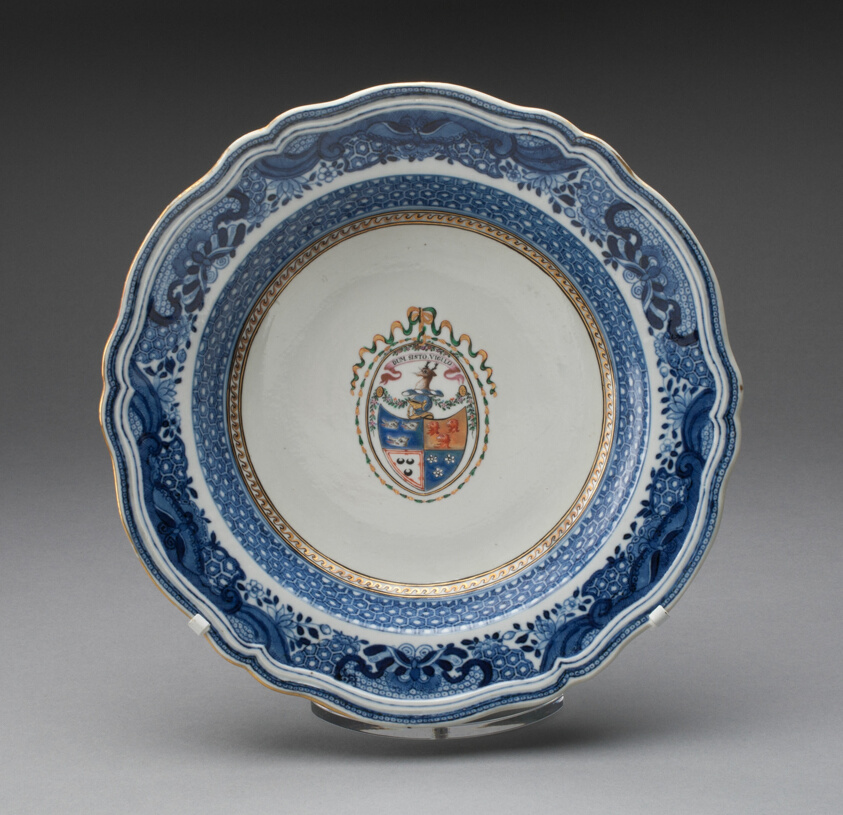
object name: Ceramics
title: Soup Plate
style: chinese export, Chinese (culture or style), East Asian, asian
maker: China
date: c. 1780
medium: Hard-paste porcelain with polychrome enamels and gilding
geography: Jingdezhen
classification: plate (general, dish); dish (vessel); chinese export porcelain; porcelain; european decorative arts; ceramics